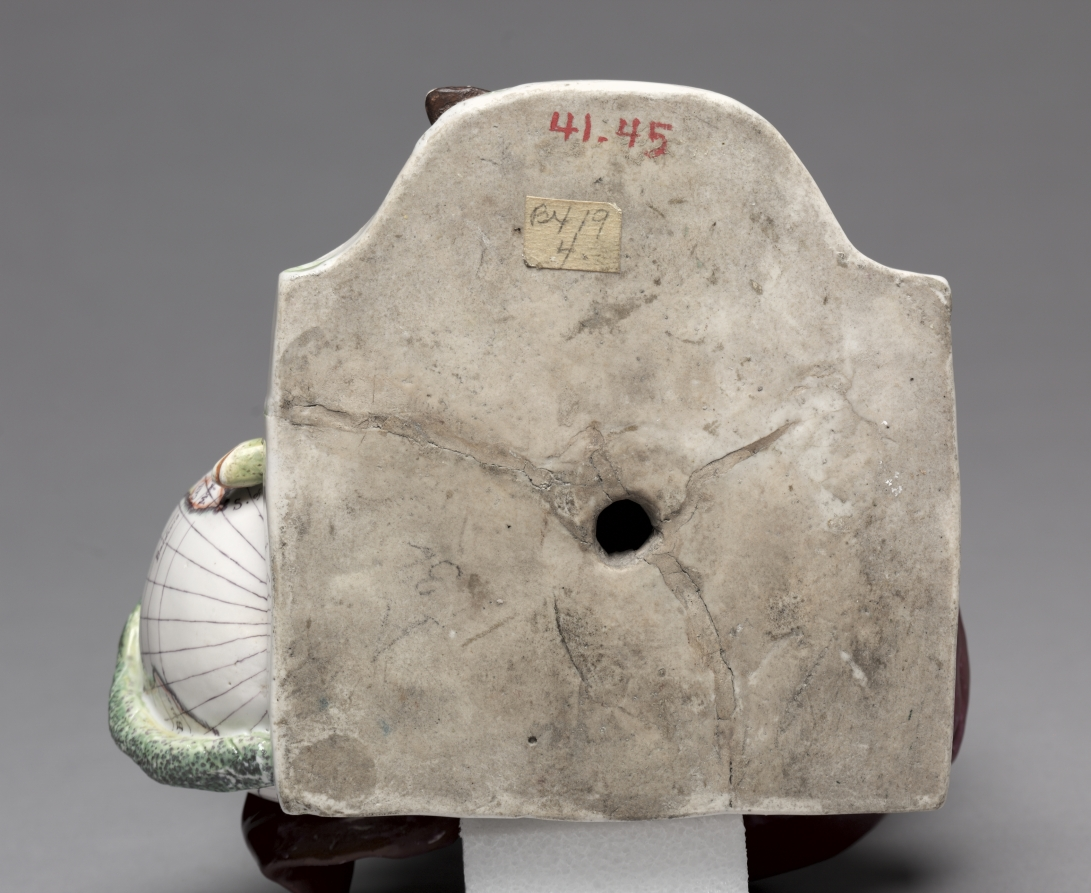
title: Madonna and Child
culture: England, Chelsea, 18th century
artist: Chelsea Porcelain Factory (Britain, London, 1745–84)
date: c. 1755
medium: porcelain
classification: Ceramic